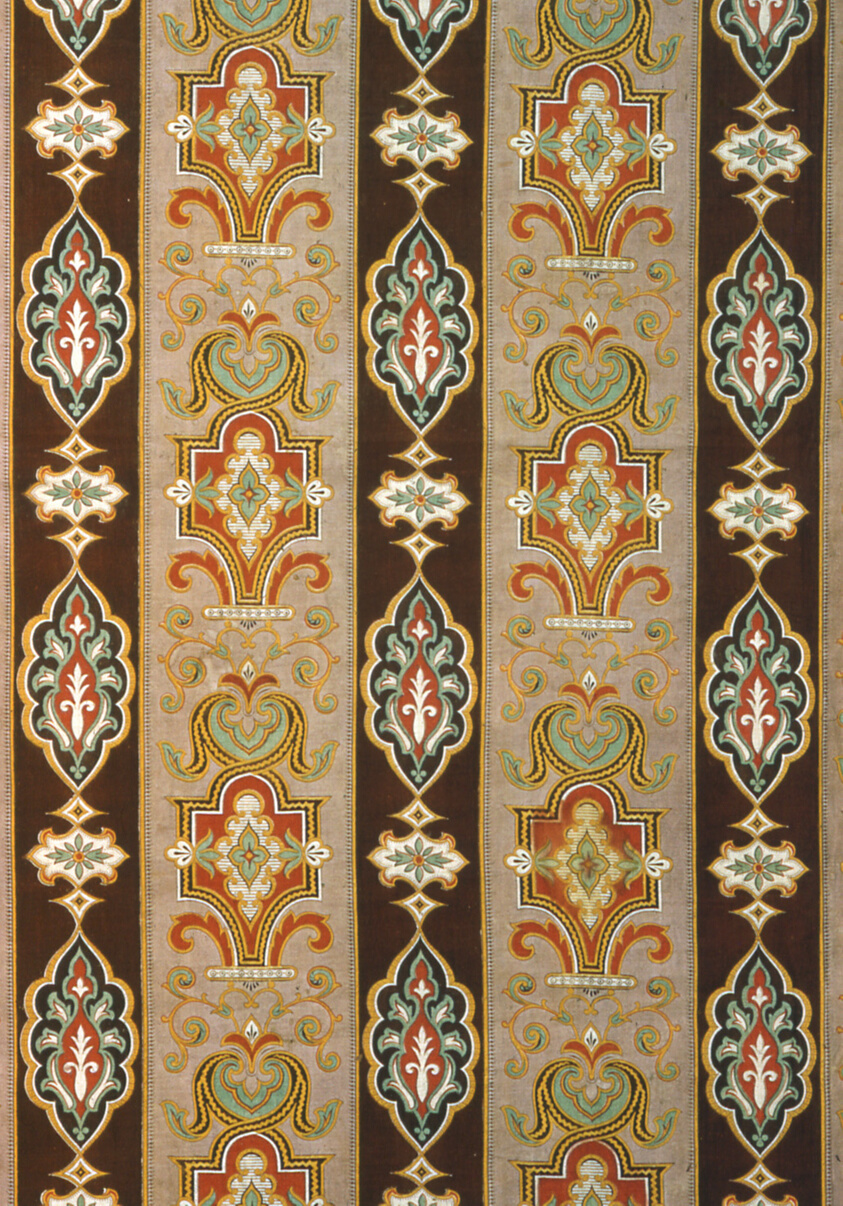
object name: Textile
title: Panel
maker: England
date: c. 1860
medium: Cotton, plain weave; printed; acorn tassel fringe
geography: England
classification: textile; weaving - printed